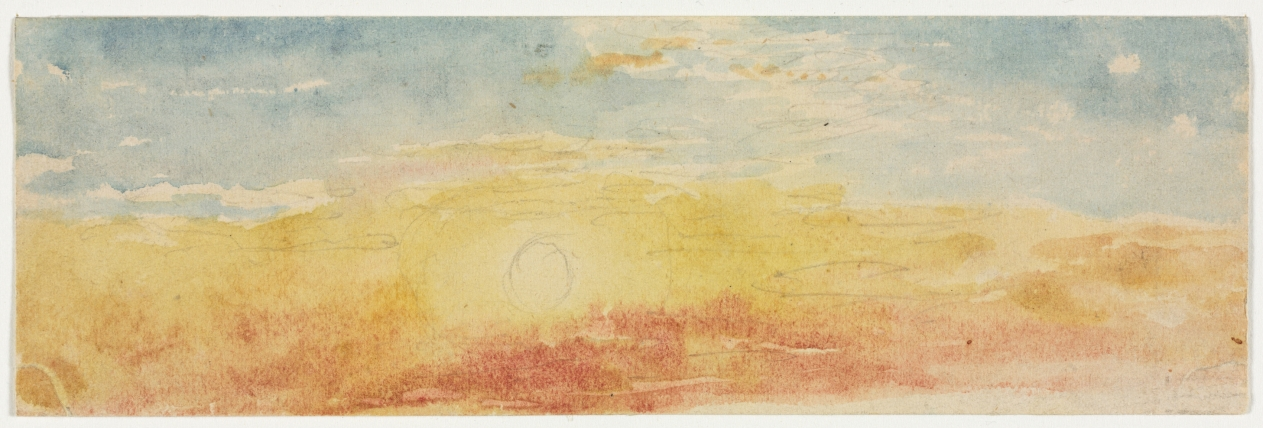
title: Cloud Study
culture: England, 19th century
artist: Anonymous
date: 1800s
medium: watercolor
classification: Drawing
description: Many English watercolorists of the period were especially interested in capturing natural effects of the landscape, such as cloud formations. Such studies were of particular interest to the French Impressionists.